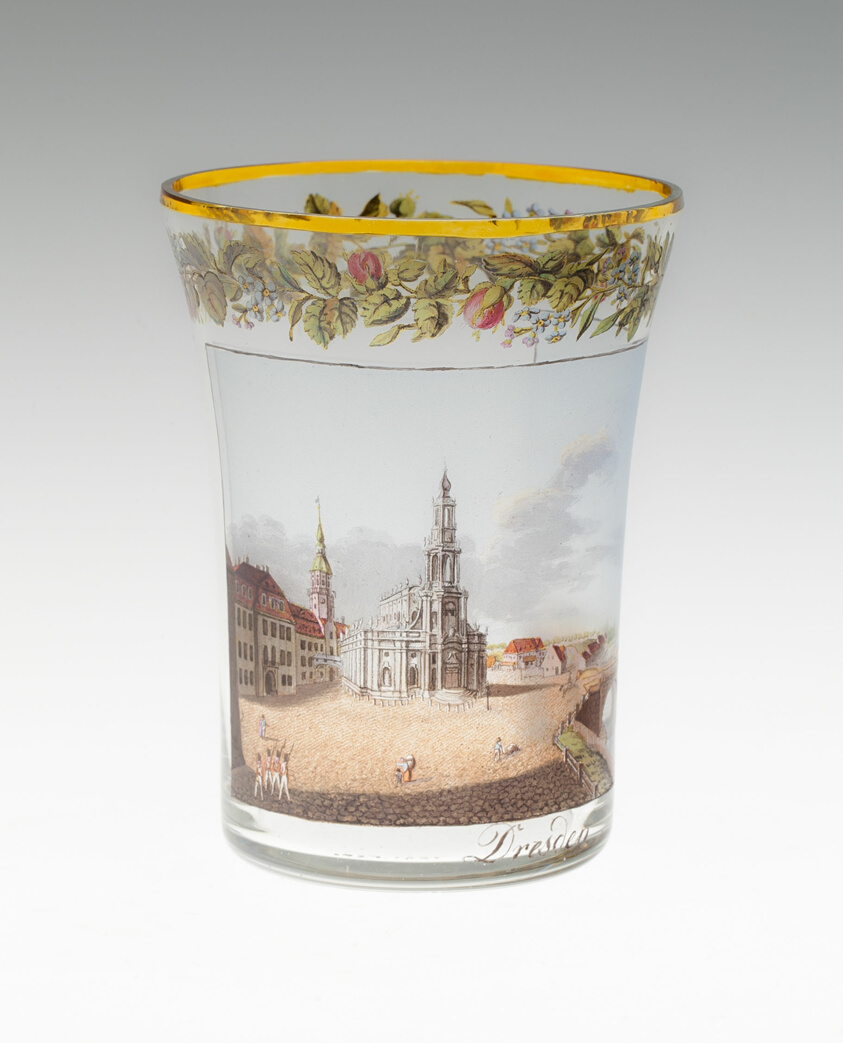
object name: Glass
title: Beaker with a view of Dresden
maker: Germany, Dresden; Gottlob Samuel Mohn (German, 1789-1825)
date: 1816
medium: Glass; colorless, blown, cut, stained and painted in transparent and opaque enamels and gilding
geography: Germany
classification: drinking vessel; glass; european decorative arts